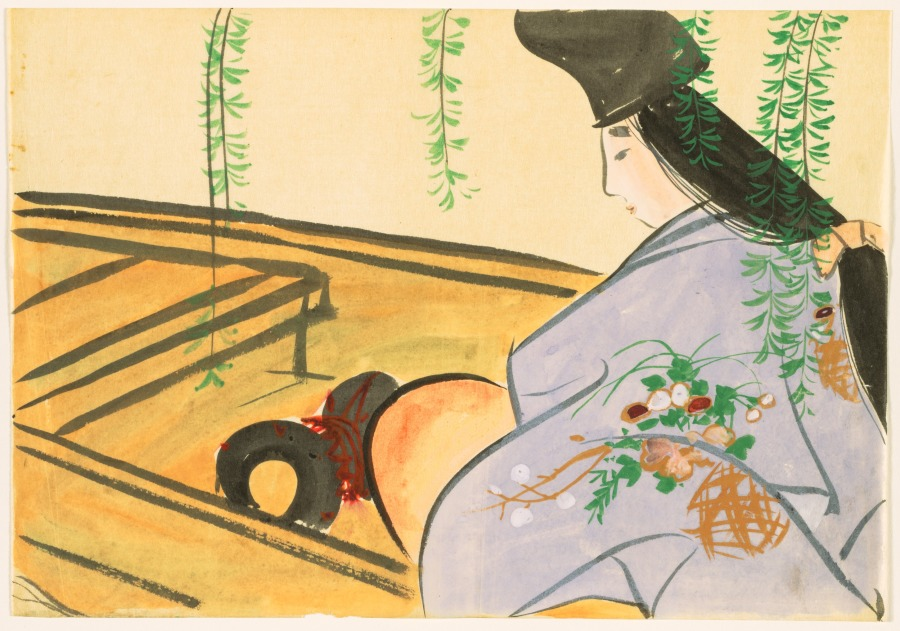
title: Flowers of a Hundred Worlds (Momoyogusa): Asazuma in Her Boat (Asazuma-bune)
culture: Japan, Meiji period (1868–1912)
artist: Kamisaka Sekka (Japanese, 1866–1942)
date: 1909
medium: ink and color on paper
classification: Drawing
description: Kamisaka Sekka made preparatory drawings for his Flowers of a Hundred Worlds series on tracing paper with ink and color. The freehand sketches are much looser than the finished, printed compositions.